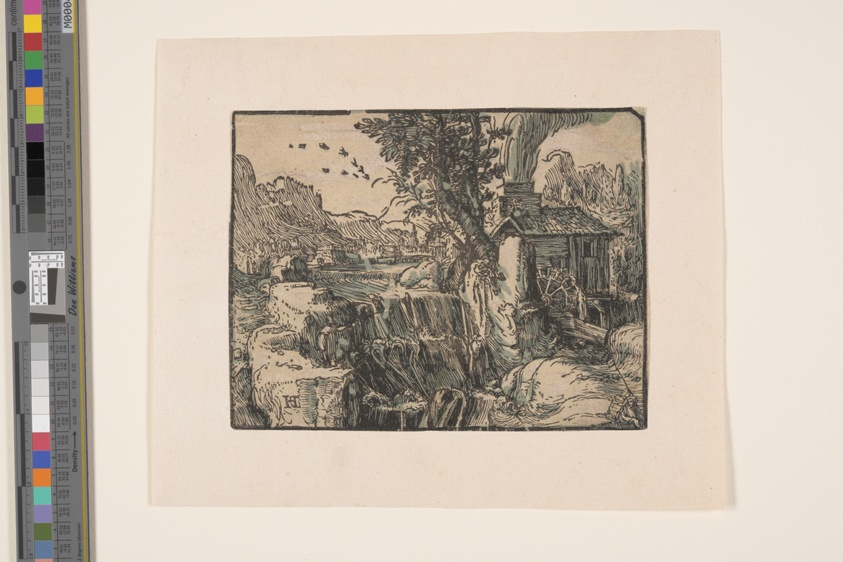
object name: Print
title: Landscape with a Waterfall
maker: Hendrick Goltzius (Dutch, 1558–1617)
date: c. 1600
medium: Chiaroscuro woodcut from three blocks printed in beige and green on ivory laid paper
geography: Netherlands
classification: woodcut; paper; print; prints and drawing